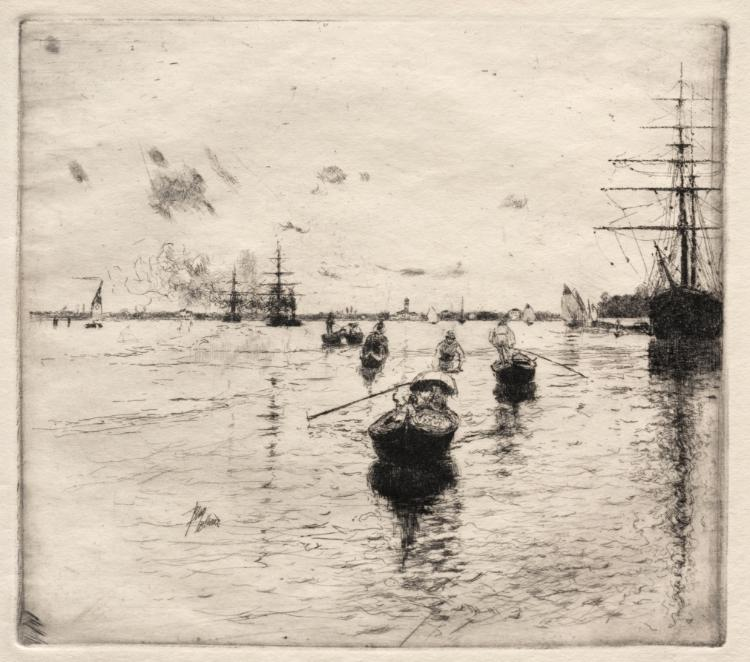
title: Lagoon with Steamers and Gondolas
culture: America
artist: Robert Frederick Blum (American, 1857–1903)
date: 1885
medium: etching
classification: Print